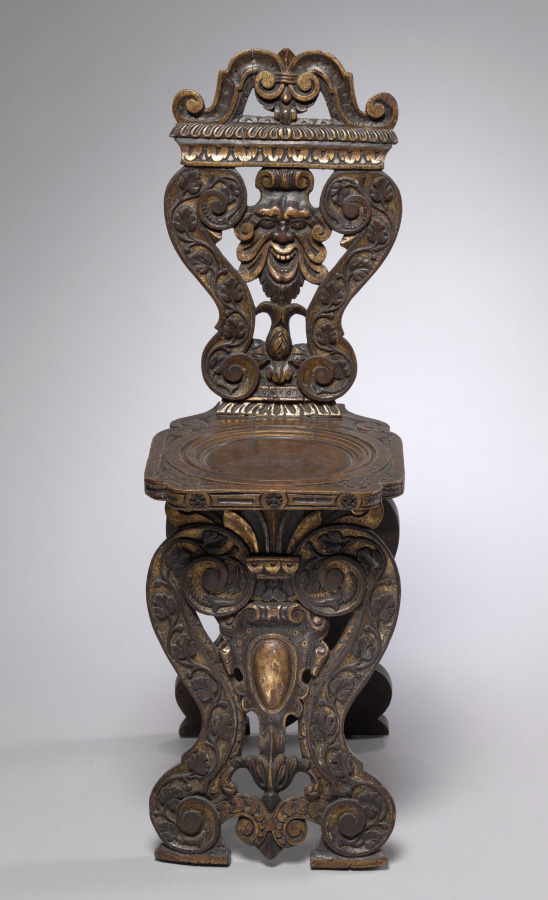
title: Chair, Sgabello type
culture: Italy, late 16th century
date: late 1500s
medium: walnut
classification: Furniture and woodwork